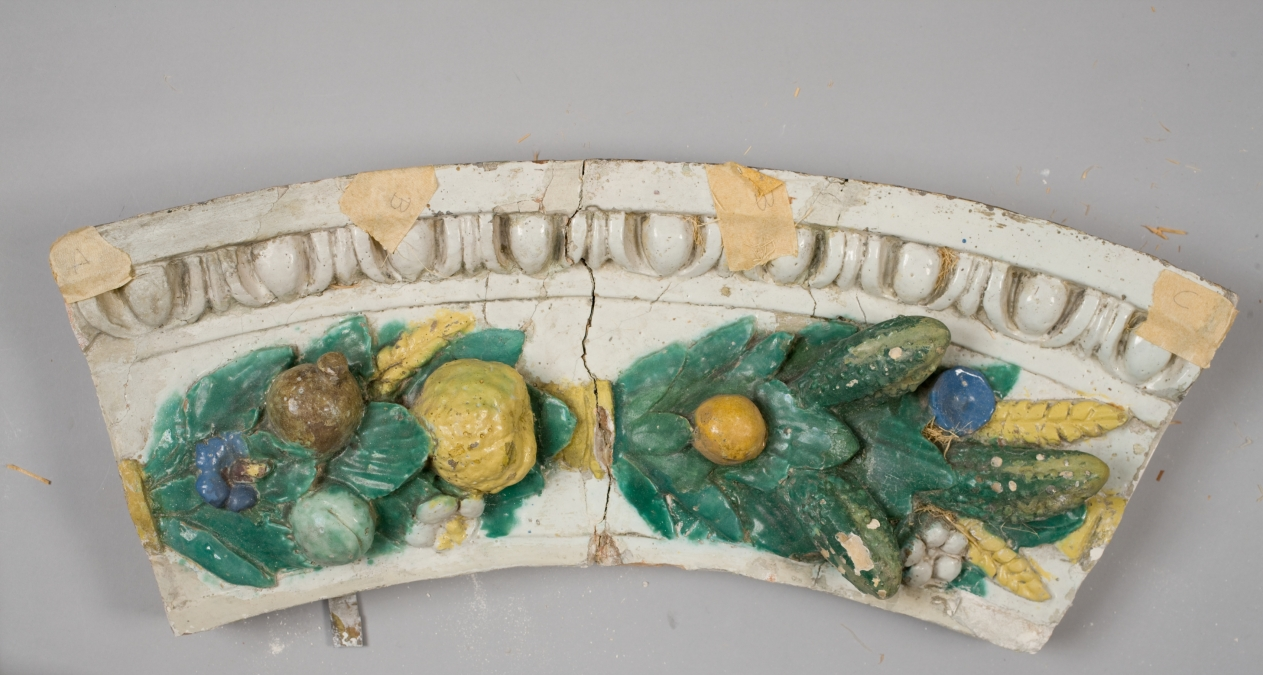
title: Fragment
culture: Italy, Florence, 16th century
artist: Benedetto Buglioni (Italian, 1461–1521)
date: c. 1900–1910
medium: glazed terracotta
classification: Sculpture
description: The Madonna sits upon a throne with the Christ Child standing on her knee. He is steadied by his mother, turning delicately to grasp the Virgin's robe for support. On the left is St. Francis, identified by his stigmata. On the right, St. Anthony Abbot is identified by his monk's robe and T-shaped walking stick. The brown robes of the saints, the purple of the Virgin's tunic (a shade characteristic of the artist), and the flesh tones of the figures contrast strongly against the bright blue background. In the semicircular sky behind the figures, three winged cherub heads emerge, representing a host of angels. The inclusion of St. Francis in this altarpiece honors the saint, suggesting that the altarpiece may have been originally built into the wall of a Franciscan institution in Tuscany. Two shields bearing the Borgherini family crest appear in the lower portion of the altarpiece's border, further suggesting that the chapel for which this altarpiece was made was likely owned or endowed by the family. Glazed terracotta is both durable and decorative and the gleaming white of this piece would have stood out in the darkness of a church. The medium was made popular by Renaissance artist Luca della Robbia and came into fashion as a substitute for expensive carved marble. A rounded arch frame embellished with fruit and flower garlands as well as egg-and-dart and cord moldings accompanied the work when it was acquired, but was later determined not to be original and removed. Buglioni's work bears the influence of the della Robbias, particularly in the simple color scheme. Buglioni likely worked in the studio of Luca's nephew, Andrea, where he would have learned the technique of glazing terracotta.